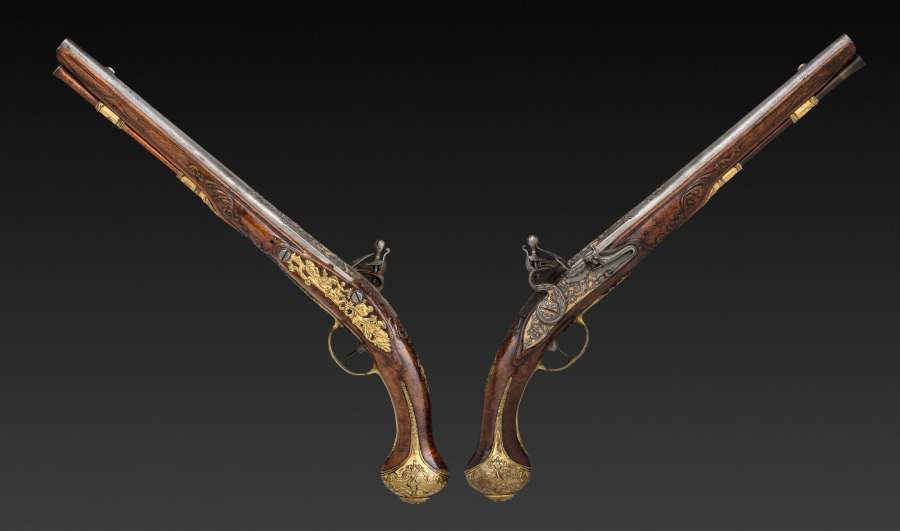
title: Pair of Flintlock Pistols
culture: Franco-Flemish, Liège, early 18th century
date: early 1700s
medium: steel with gold inlay, gilt-brass mounts; walnut burl stock; chiseled high-relief decoration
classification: Arms and Armor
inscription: G. MASSIN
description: Works of exquisite craftsmanship, this pair of pistols, on view in the museum’s armor court, feature an array of decorative elements, including carved walnut, gold inlay, and chiseled, engraved, and gilded figural designs. The barrel is signed G. MASSIN, the name of a gunsmith working in eastern France or French-speaking Flanders, possibly the city of Liège.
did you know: The flintlock ignition system was developed in the 1600s and remained the dominant system until the early 1800s.